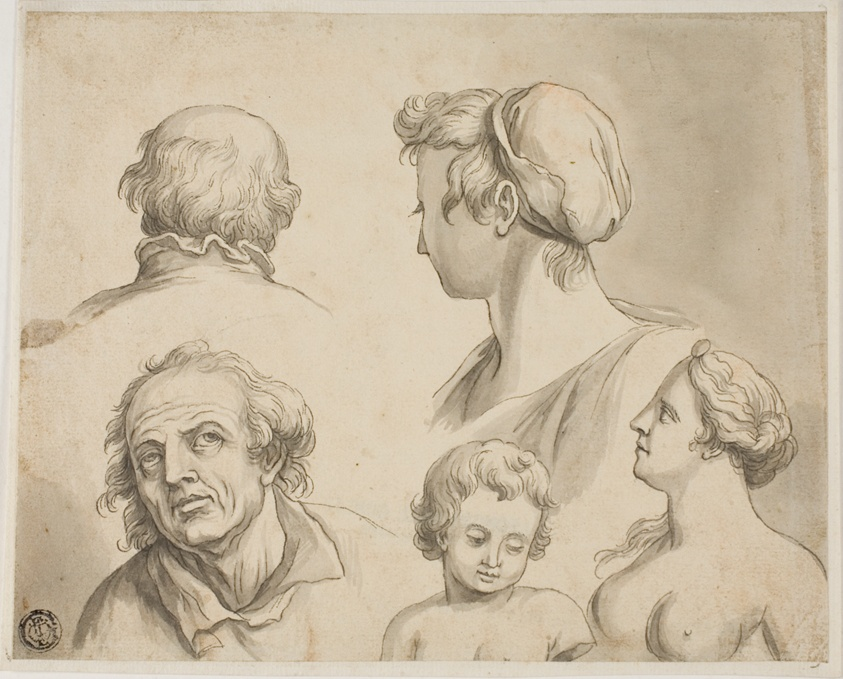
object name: Drawing and Watercolor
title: Sketches of Five Busts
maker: Gerard de Lairesse (Flemish, 1640-1711)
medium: Pen and black ink, with brush and gray wash, on cream laid paper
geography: Flanders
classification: pen and ink drawings; drawings (visual works); prints and drawing